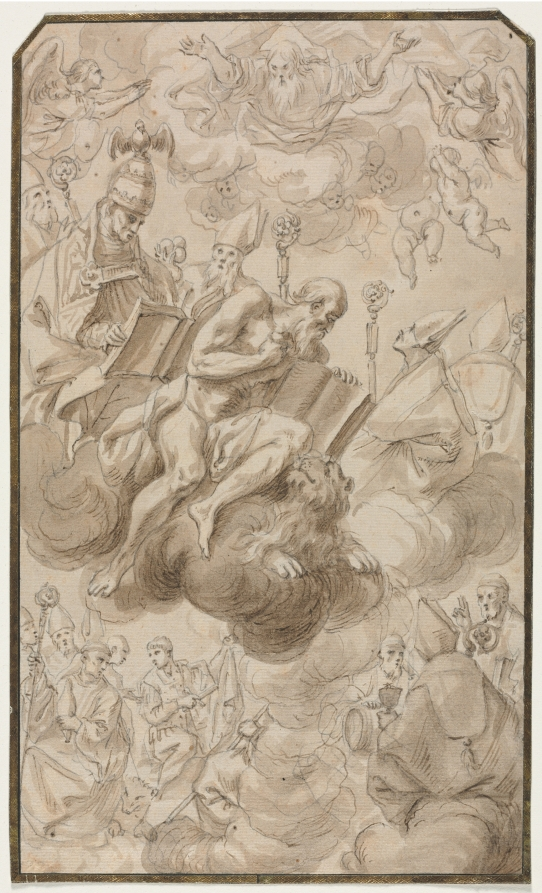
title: Ascension of Saint Jerome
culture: Italy, 17th century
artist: Karel Skréta (Czech, 1610–1674)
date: 1600s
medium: pen and brown ink, graphite and brush and brown wash; framing lines in black ink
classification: Drawing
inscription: VERSO, lower left, in brown ink: 11+. [+ in superscript]